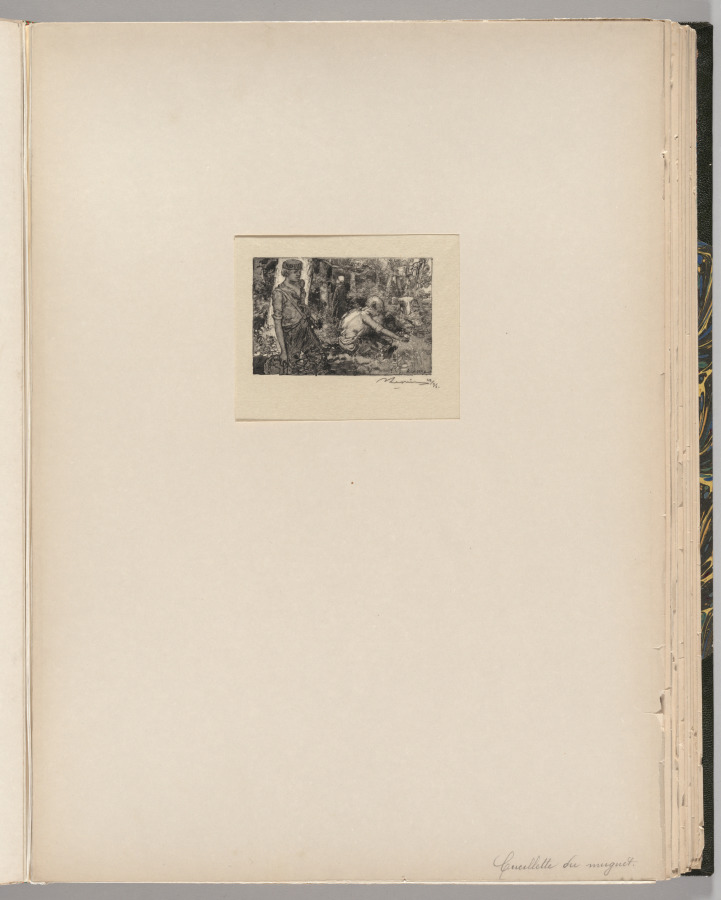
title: Fontainebleau Forest: Gatherine Lily-of-the-Valley (La Forêt de Fontainebleau: La Cueillette du Muguet)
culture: France, 19th century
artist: Auguste Louis Lepère (French, 1849–1918)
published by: A. Desmoulins, Published in Revue Illustrée, 1887–90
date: 1890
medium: wood engraving from bound volume of 34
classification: Bound Volume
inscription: In block, lower right: A. LEPERE. del.; below image, lower right, in black ink: ALepère 22/35; on window mat, lower right, in graphite: Cueillette du muguet